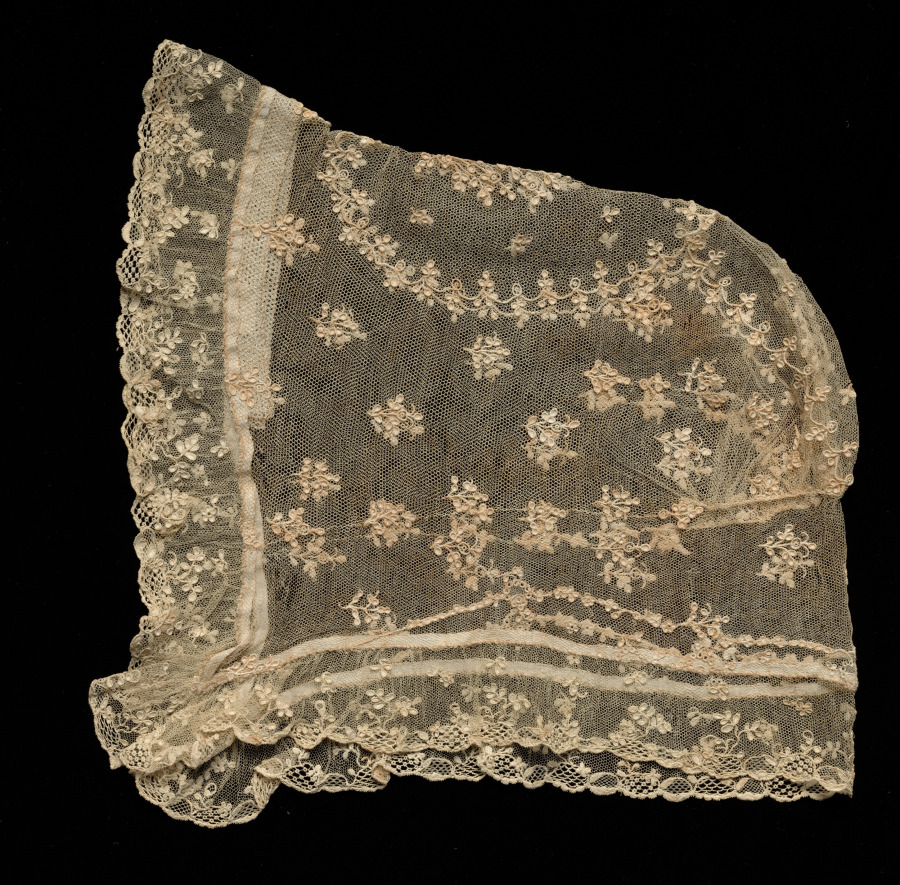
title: Lace Cap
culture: France, Alençon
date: 1700s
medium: Linen: needle lace (point d'Alençon)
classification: Lace